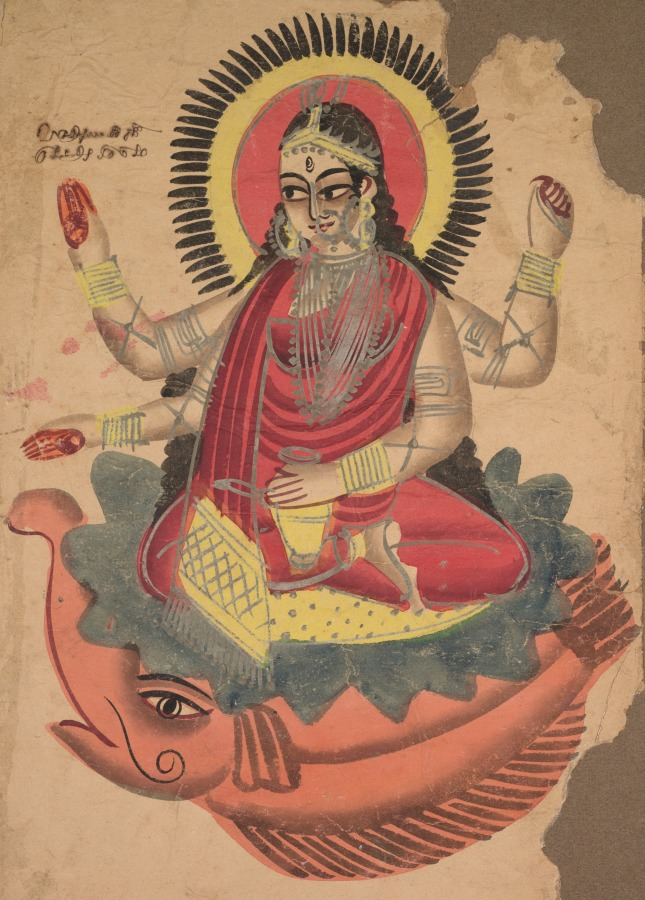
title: The Goddess Ganga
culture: Eastern India, Bengal, Kolkata, Kalighat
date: c. 1890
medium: Gum tempera, graphite, ink, and tin on paper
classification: Painting